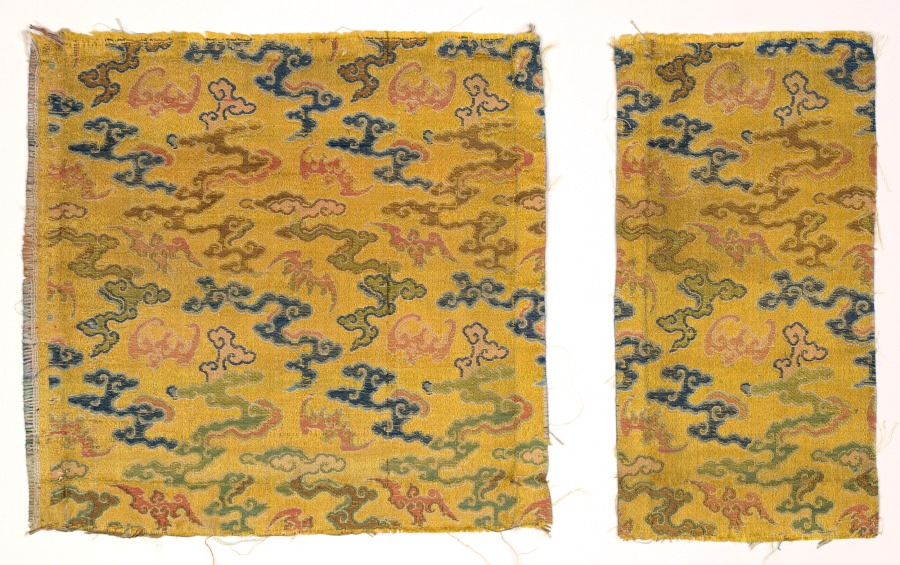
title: Fragments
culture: China, Qing dynasty (1644-1911)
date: 1700–1720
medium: Silk, diaper weave; satin ground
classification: Textile